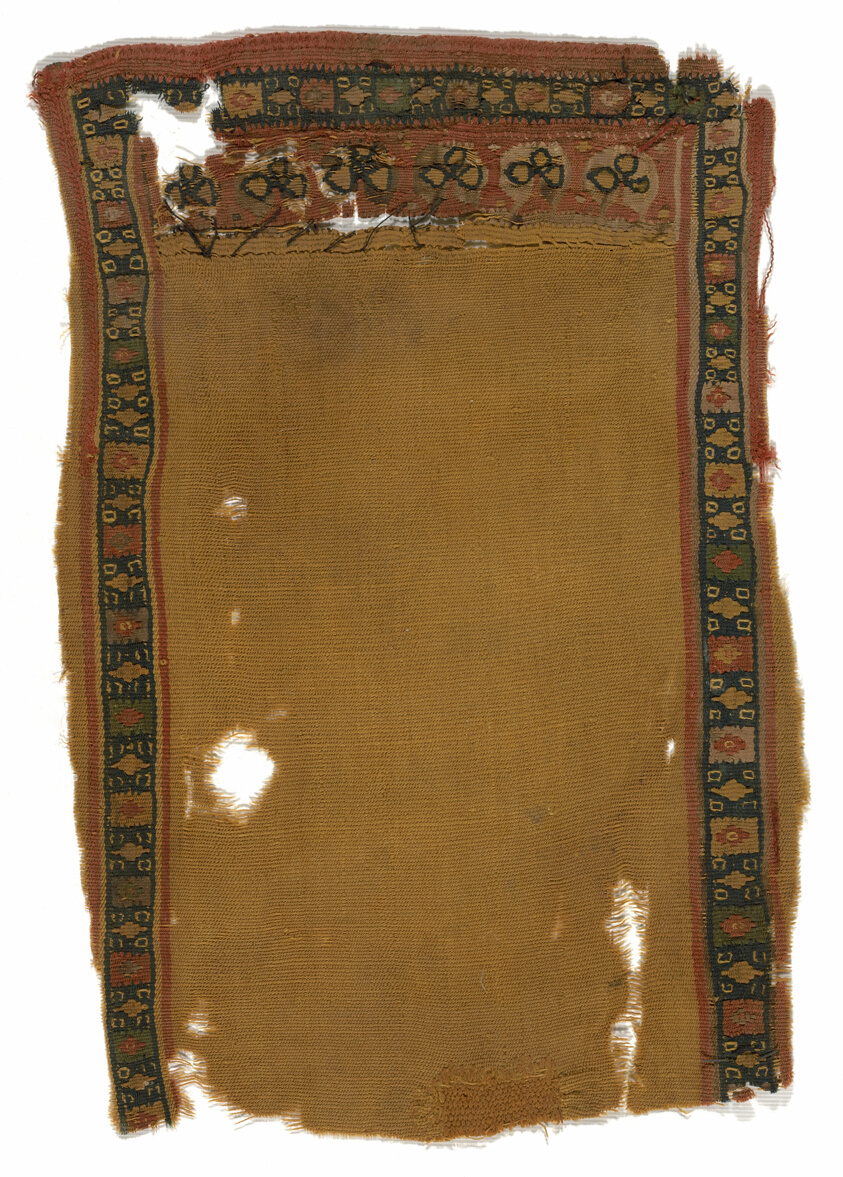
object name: Textile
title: Fragment (From a Tunic)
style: roman period (egyptian)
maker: Coptic (Egypt)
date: Roman period (30 B.C.– 641 A.D.), 5th/6th century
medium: Wool, tapestry weave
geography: Egypt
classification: textile; weaving